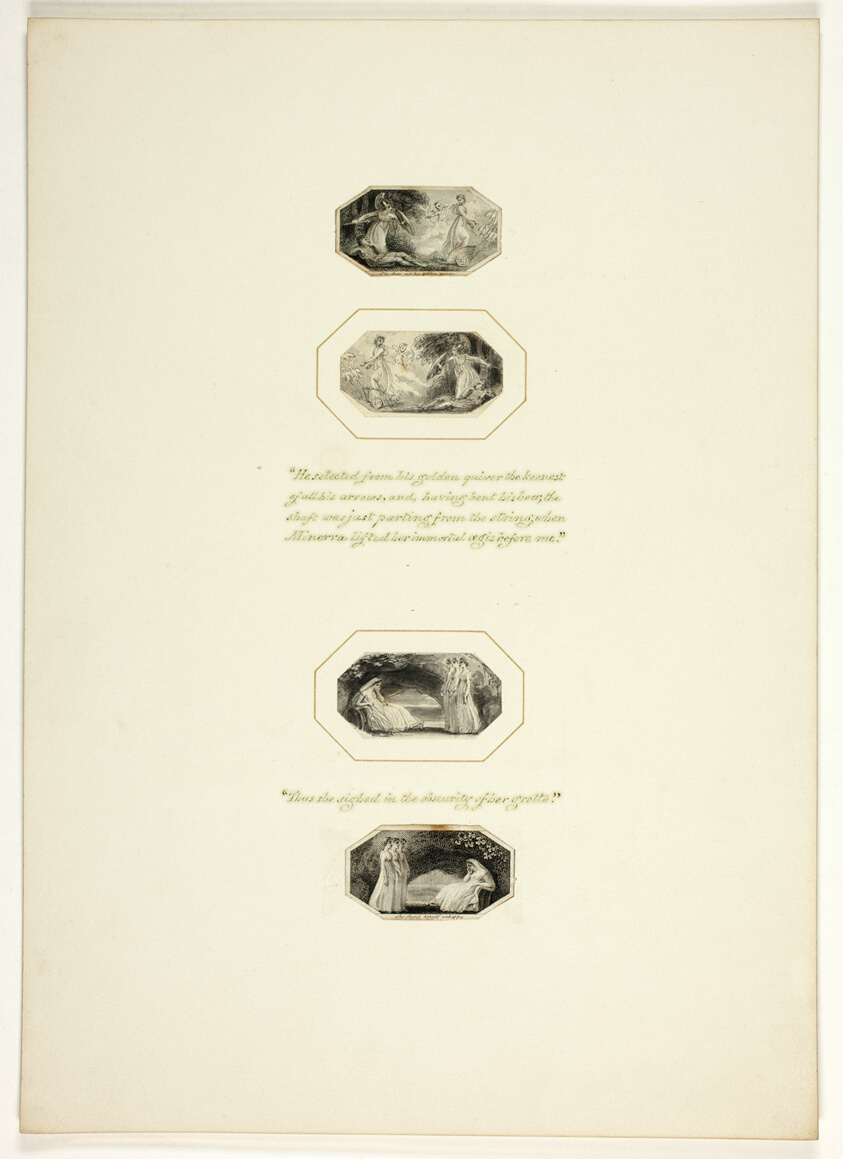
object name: Print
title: Plate from Telemachus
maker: after Thomas Stothard (English, 1755-1834); published by T. Baker (English, 19th century)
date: c. 1797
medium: Engraving on paper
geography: England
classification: engraving; drawings (visual works); prints and drawing; print